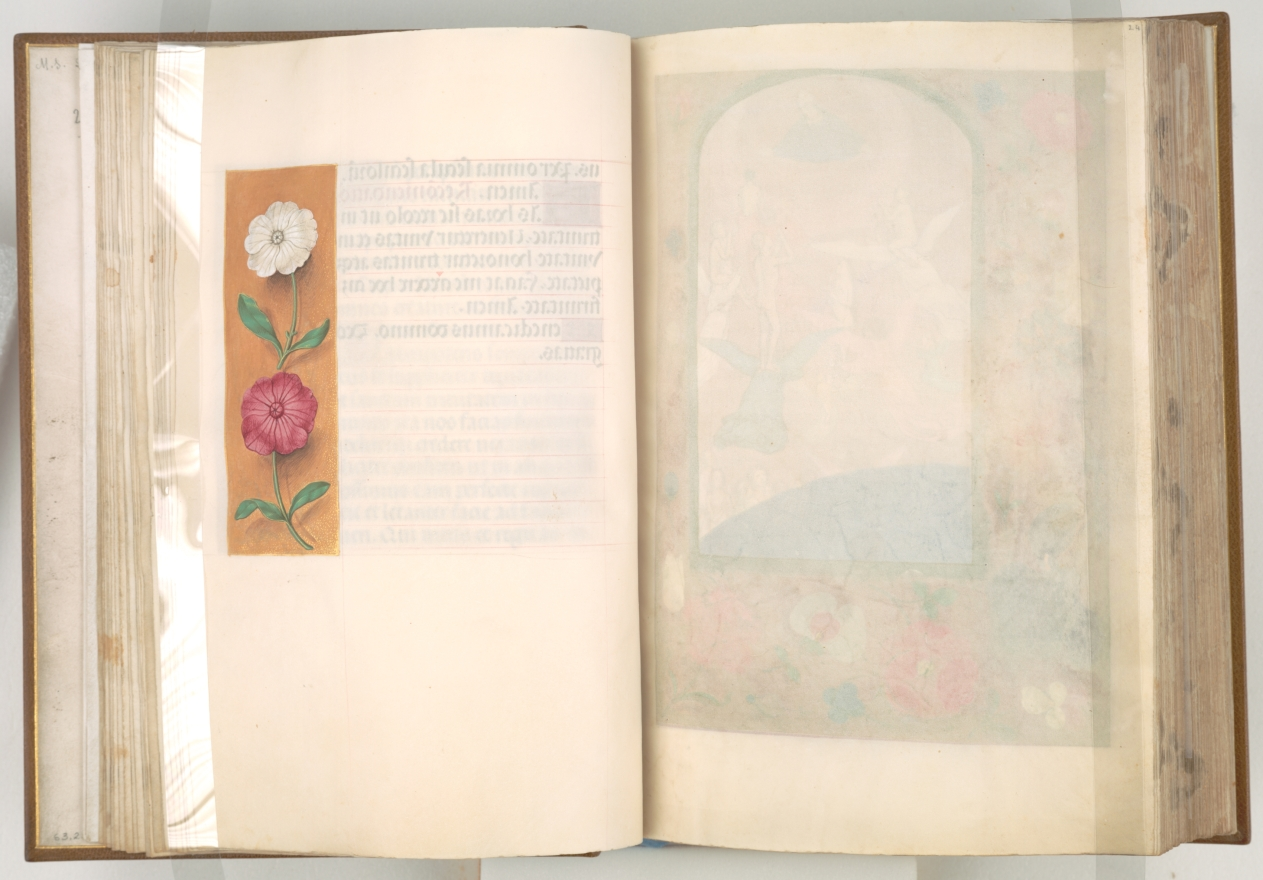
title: Hours of Queen Isabella the Catholic, Queen of Spain: Fol. 24r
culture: Flanders, Ghent and Bruges, late 15th century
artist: Master of the First Prayerbook of Maximillian (Flemish, c. 1444–1519)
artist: and Associates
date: c. 1500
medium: ink, tempera, and gold on vellum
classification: Bound Volume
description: This manuscript was illuminated by a circle of at least five highly organized manuscript painters active in the Flemish cities of Ghent and Bruges. The principal illuminator was Alexander Bening, who painted the majority of the book's miniatures. Manuscripts produced by this circle of artists are renowned for the decoration of their borders, which typically feature a rich variety of realistically-painted flowers, birds, and butterflies. This prayer book, called a book of hours, was intended not for a cleric, but for the private devotions of a lay person-in this case, Isabella the Catholic, Queen of Spain (1451-1504). Isabella's coat of arms embellishes the book's frontispiece. It is unlikely that the book was commissioned by the Queen herself; rather, she probably received it as a diplomatic gift from someone courting her patronage, perhaps Cardinal Francisco Jimenez de Cisneros. A Franciscan friar, Jimenez was dependent upon Isabella for his advancement, first to the post of Queen's confessor in 1492, and then to Archbishop of Toledo in 1495.